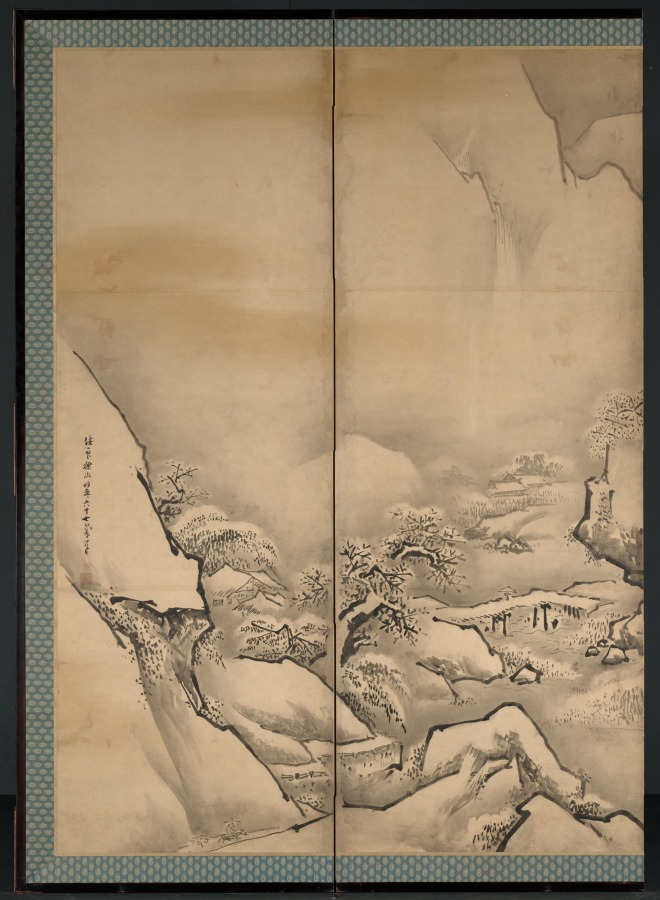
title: The Four Seasons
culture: Japan, Edo period (1615–1868)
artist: Kano Tan’yū (Japanese, 1602–1674)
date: 1668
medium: Six-panel folding screen, ink and slight color on paper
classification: Painting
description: Tan'yū's skills were honed early within the regimen of the Kano family's painting studio. His grandfather, Eitoku (1543–1590) was the Momoyama period's most sought-after painter, a champion of colorful, large-scale painting compositions who worked for several of the country's most powerful leaders. When the young Tan'yū was summoned to Edo in 1617 by the shogun to become a member of the new capital's official painting studio, few opportunities to work on similarly ambitious projects existed. Yet by the end of his career, Tan'yū had supervised the execution and installation of linked mural painting compositions in several of Japan's most prestigious residences and castles. As an official court painter to the first shogun, Tokugawa Ieyasu (reigned 1603–5), and then his successors, Tan'yū appears to have successfully juggled his official duties with private activities as a teacher, as the era's leading connoisseur of classic Chinese and Japanese painting, and as a practicing artist. His surviving compositions as well as thousands of sketches far surpass the oeuvre of any of his contemporaries. While studio assistants surely contributed to his oeuvre, just as later imitators consciously confused his accomplishments, a clearer image of the painter has emerged in recent years that better conforms with his contemporary acclaim as recorded in seventeenth- and eighteenth-century documents. Tan'yū can now be seen as an artist adept in virtually all traditional ink painting subject matter, which he often presented in novel interpretations. Equally important are his rare screen (byōbu) compositions executed in a pure yamato-e manner with vivid mineral pigments on a gold-foil background. This pair of byōbu presents Tan'yū's more orthodox approach to academic ink painting methods embracing Chinese themes that had been interpreted by numerous Japanese ink painters over the centuries. Thus a typical view of residences and human activities set along the shores of an impressive river (or lake) is enlivened by the Japanese proclivity for including seasonal references. Proceeding from right to left, the viewer passes sequentially from spring to the snow-laden branches of winter. Tan'yū lends considerable atmospherics to the panorama in his use of misty cloud banks, frequently set off by sharp, darkened ink lines or whole areas of ink washes of variegated tonalities. The spring and summer views are particularly notable in this regard, as is the presence of the artist's signature on both byōbu, attesting to their completion in Tan'yū's sixty-seventh year (1668)—50 years after he left Kyoto for the capital, and 30 years following his adoption of the artist name "Tan'yū" (in 1635). From 1622, when he began work on the mural paintings for Edo castle (the shogun's formal residence), through the completion of the painting cycle in 1636 for the Tokugawa family mausoleum in Nikkō to the north of Edo, Tan'yū's skills as head of an accomplished painting studio as well as a master painter found their most impressive expression in large-scale compositions. In 1638 he received the honorary Buddhist title Hōgen (Eye of the Law). It is intriguing therefore that relatively few independent byøbu paintings from the master's hand survive, particularly documented early works.